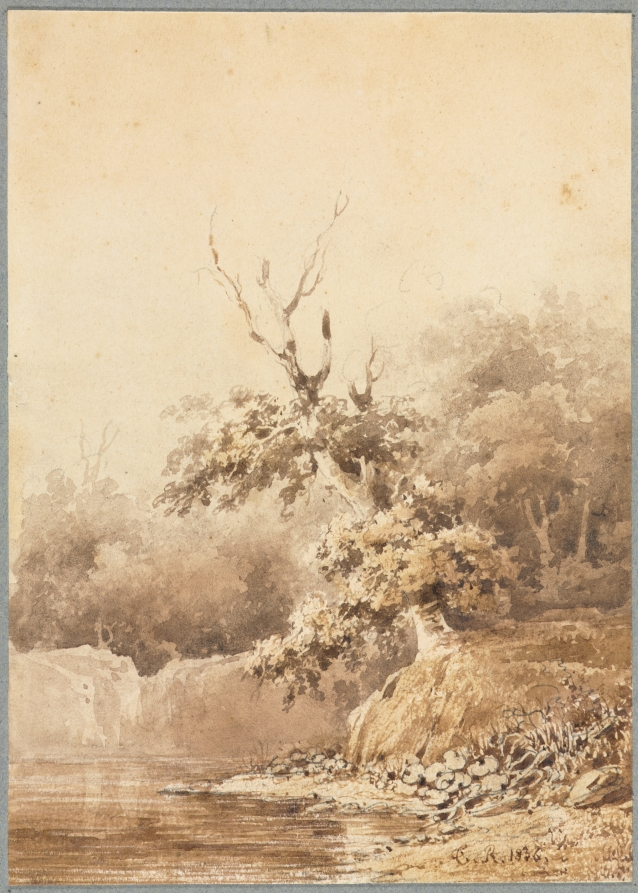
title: Landscape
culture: France, 19th century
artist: Théodore Rousseau (French, 1812–1867)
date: 1836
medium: pen and brown ink, ink wash, graphite underdrawing and selective gum glazing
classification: Drawing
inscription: inscribed in brown ink, lower right: "T.R.1836"